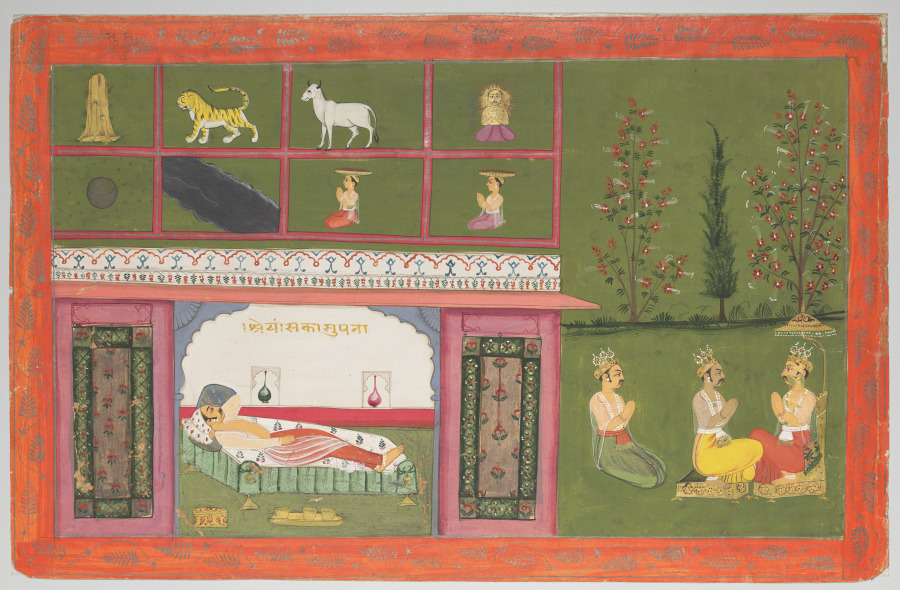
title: Prince Shreyamsa dreams of the coming of Rishabha, from a Panchakalyanaka (Five Auspicious Events)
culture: Northwestern India, Rajasthan, Rajput Kingdom of Amber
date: 1670–80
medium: Gum tempera, ink, silver, and gold on paper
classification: Painting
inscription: [[recto, devanagari inscription over the sleeping prince]] śreyaṁsakāsupanā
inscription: [[verso, upper left margin]] 25.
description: Dreams foretell important events in Indian literature. In this painting a prince lies half asleep and experiences eight visions, pictured above the reclining figure. At the right, the prince on the throne with the royal umbrella seeks help interpreting the dreams. They predicted the coming of Rishabha, the first Jina, who has been fasting for a full year. The prince then became the first person in the world to give proper alms, or pious offerings, to a Jina. This painting is from a group that is recognized as the first Jain manuscript made in the form of a pictorial series, rather than a handwritten manuscript.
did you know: This painting is from the earliest known Jain series made in a Mughal-inspired style.